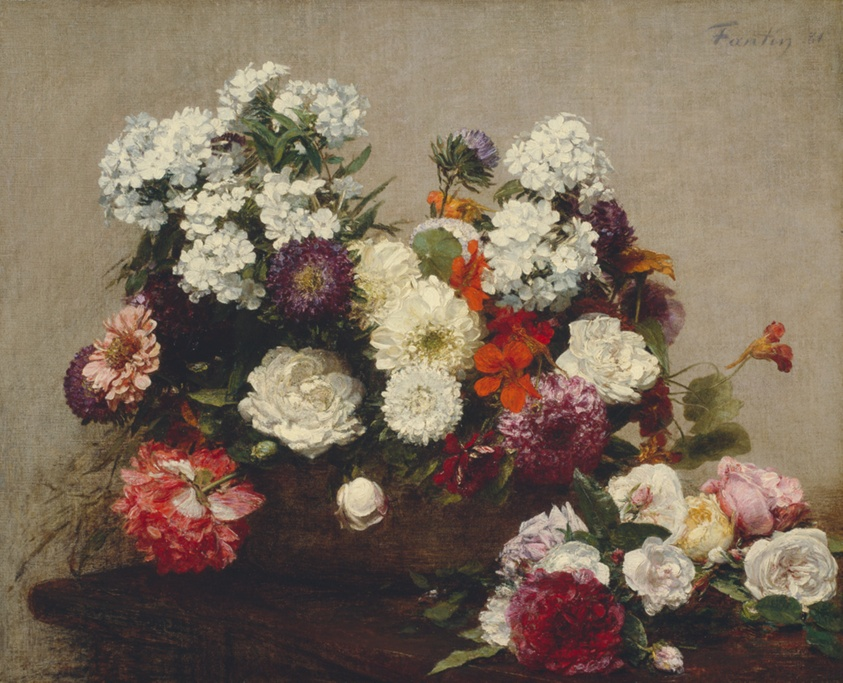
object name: Painting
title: Still Life with Flowers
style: Impressionism, 19th century, nineteenth century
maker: Henri Fantin-Latour (French, 1836–1904)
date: 1881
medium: Oil on canvas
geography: France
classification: oil on canvas; france; french; oil paintings (visual works); paint; still life; painting; european painting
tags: still life, flowers, France, French, leaf, leaves, pink (color), purple (color), red (color), table, white (color)